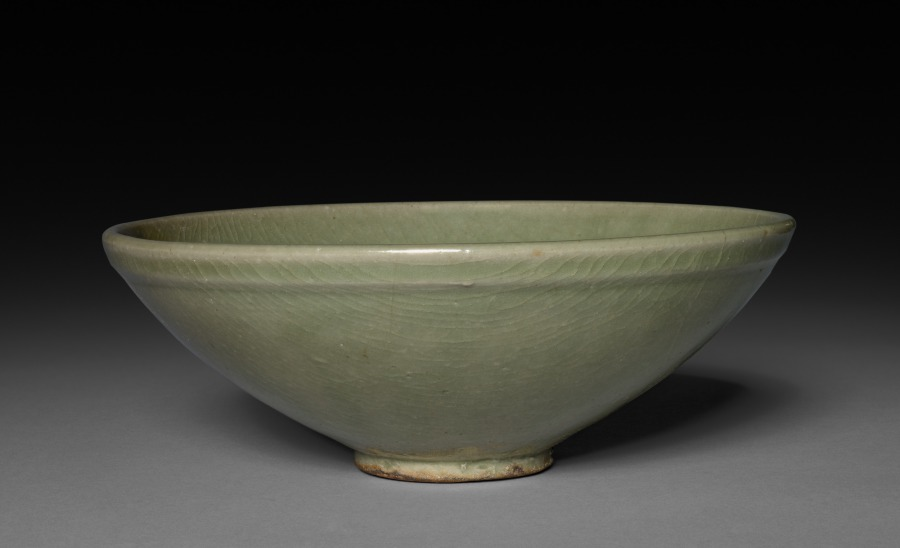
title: Bowl with carved floral decoration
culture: China, probably from the Yaozhou kilns, Shaanxi Province, Northern Song dynasty (960-1127)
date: 1100s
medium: Glazed porcelain, Northern Celadon ware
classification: Ceramic